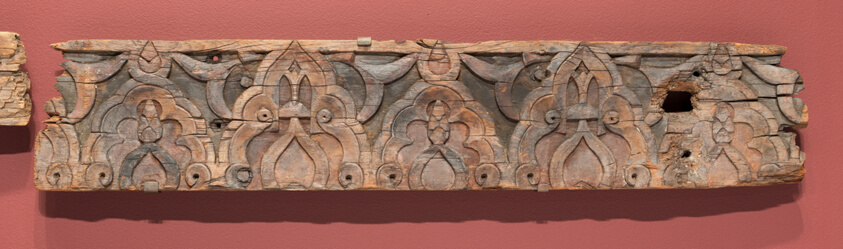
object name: Architectural fragment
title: Carved Wooden Panel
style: Islamic (culture or style)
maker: Morocco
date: Marinid dynasty (1244–1465), 14th century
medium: Carved wood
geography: Morocco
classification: wood; architectural fragment; asian art